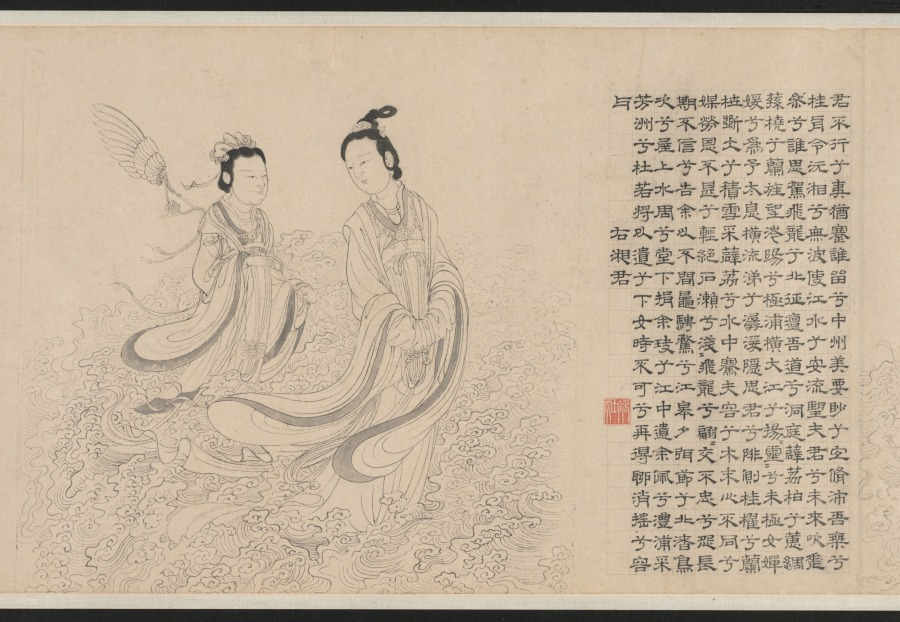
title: Nine Songs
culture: China, Yuan dynasty (1271-1368)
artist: Zhang Wo (Chinese, active c.1336–after 1364)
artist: Chu Huan (Chinese, active 1361)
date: 1361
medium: handscroll; ink on paper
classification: Painting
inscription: 7 colophons and 47 seals: 1 colophon, dated 1361, and 28 seals of Chu Huan 褚奐 (active c. 1361); 1 colophon, dated 1785, and 1 seal of Lu Shihua 陸時化 (1714-1779); 2 seals of Lu Yü-ch'ing (18th c.); 1 colophon, dated 1935, of Ye Gongchuo 葉恭綽 (1881-1968); 1 colophon, dated 1935, of Wu Hufan 吳湖帆(1894–1968); 1 colophon, dated 1938, and 1 seal of Wang Tongyu 王同愈 (1856-1941); 1 colophon, dated 1941, of Wu Huayuan 吳華源 (1893-1972); 1 colophon, dated 1942, and 9 seals of Xu Bangda 徐邦達 (1911–2012); 1 colophon, dated 1942, of Lang Jingshan 郎靜山 (1892-1995); 1 colophon, dated 1944, of Tang Yun 唐雲 (1910-1993); 6 seals of Wang Jiqian [C.C. Wang] 王季遷 (1907–2003).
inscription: Text of The Nine Songs written by Chu Huan at the end of each section.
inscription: 右離騷九歌圖，宋龍溟居士李公本，淮南張渥叔厚所畫妙絕當世。家藏請予書其辭目識于左。至正二十一年辛醜三月旦河南褚奐記。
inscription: Colophon by Lu Shihua 陸時化 (1714–1789): This scroll is fortunate to have been handed down from collections of the right people. Now, after 500 years, its condition is as good as when it was painted. I acquired this from Mr. Shen Guiyu [1673-1769], the President of the Board of Rites. The label is in his handwriting when he was 95 years old. I submit that Chu Huan (t. Shiwen) of the Yuan Dynasty was a native of Qiantang. His "seal" and li writings are in the style of Wu Rui. For example, in [Chu Kuei's] Ming ji lu [A list of masterpieces] is recorded the stele commemorating the restoration of the prefectural school of Kun-shan, the text of which was composed by Yang Weizhen in the twenty-first year of Zhizheng [1361]; and the calligraphy as well as the title in li style was by Chu Huan, who was at that time an assistant judge of the prefecture of Haining in the circuit of Hangzhou. Zhang Wo's zi is Shuhou (叔厚). His literary name is Zhen Qisheng (贞期生). According to [Gu Ying's] Yu shan cao tang ya jii, he liked to paint in the bai-miao or the "pure delineation" style after the method of Li Longmian [Li Gonglin 李公麟], which finds no peer among the ancient masters. This is agreed upon [by Pei Ch'iung] in his Qing jiang zhi who praised [Zhang Wo] as being quite learned and well-versed in many branches of the arts, especially figure painting. Recorded by Lu Shihua [The mountain dweller], listening to the pine, in the twelfth month of the yisi year [1785].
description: Painted in the baimiao, or fine-line drawing style, this ancient work demonstrates the literati’s use of abstract calligraphic brushwork for self-expression. The subject of the “Nine Songs”—songs associated with shamanistic rituals in the ancient Chu kingdom—had traditionally provided artists with myths and legends that they could explore and reinterpret in their own works.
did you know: Divided into eleven sections, the scroll contains illustrations by painter Zhang Wu followed by a transcription of the relevant verse by calligrapher Chu Huan.